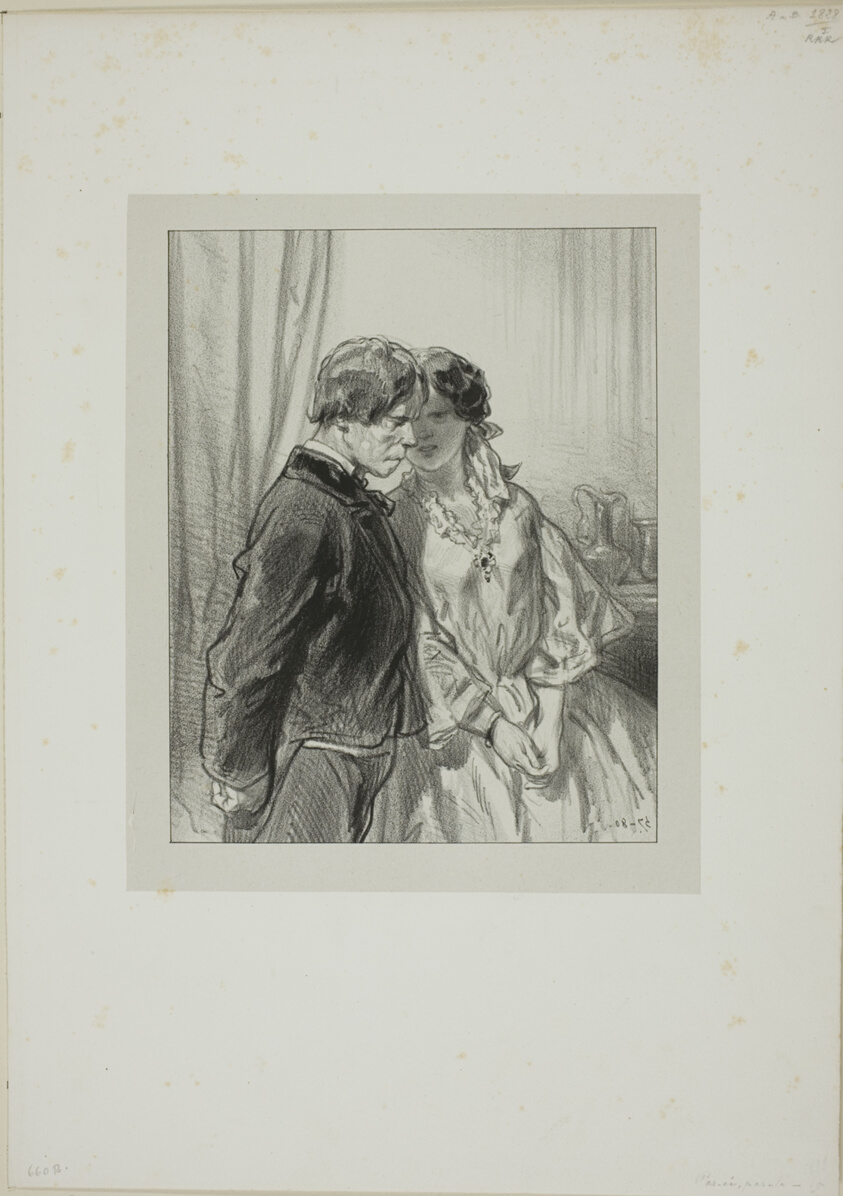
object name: Print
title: Masks and faces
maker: Paul Gavarni (French, 1804-1866)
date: 1857–58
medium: Lithograph in black on light gray China paper, laid down on ivory wove paper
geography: France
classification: lithograph; print; prints and drawing